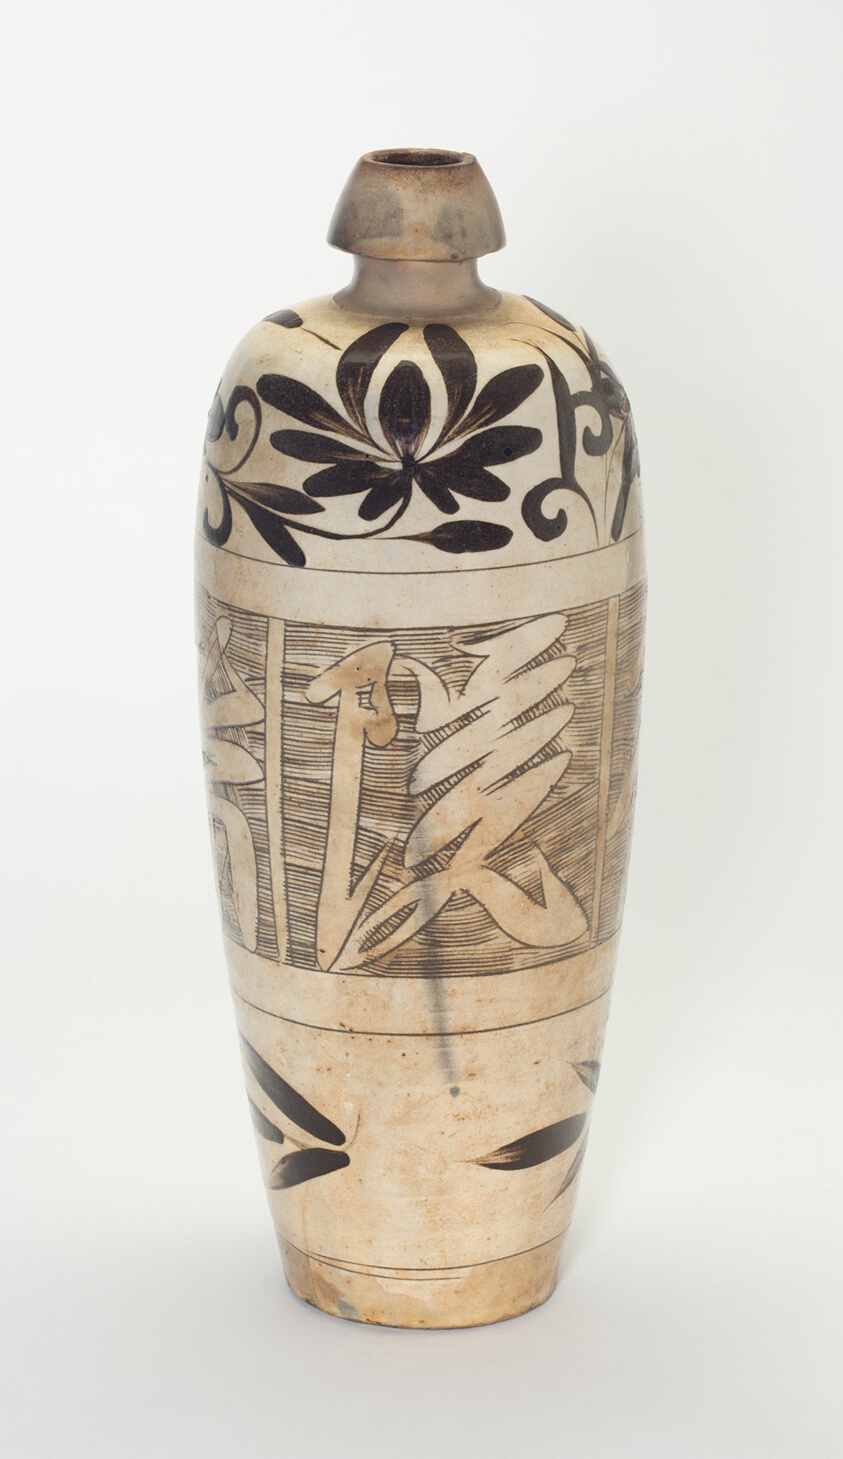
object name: Vessel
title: Elongated Ovoid Vase (Meiping) with Stylized Flowers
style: Chinese (culture or style)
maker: China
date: Jin dynasty (1115–1234), 12th century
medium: Cizhou ware; slip-coated stoneware with incised, combed, and overglaze painting in iron brown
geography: China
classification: vase; vessel; stoneware; asian art; ceramics